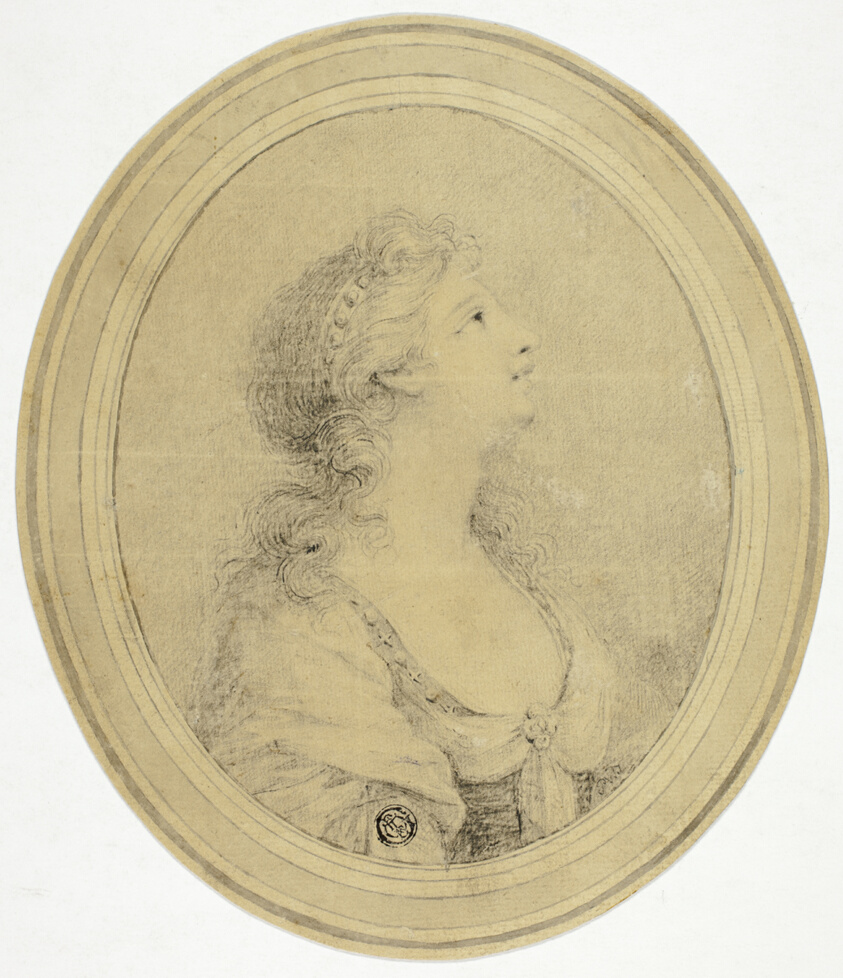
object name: Drawing and Watercolor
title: Half-Length Portrait of Woman in Profile, Facing Right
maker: Peltro William Tomkins (English, 1760-1840)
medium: Black crayon, with traces of graphite, on tan laid oval-shaped paper, laid down on tan oval-shaped laid card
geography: England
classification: chalk; drawings (visual works); prints and drawing